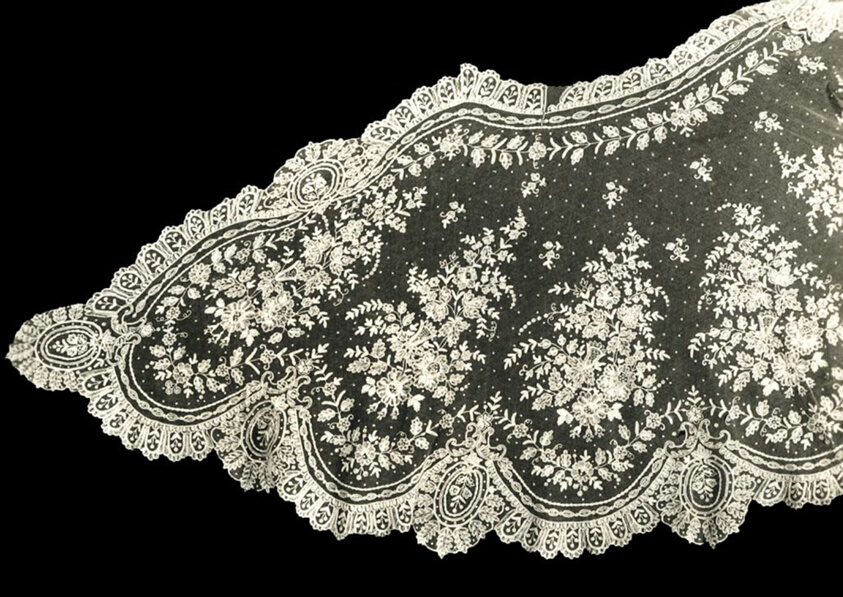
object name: Textile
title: Cape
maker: England or France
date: 1850s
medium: Cotton, machine-made twist net; embroidered in chain stitches (tambour work); edged with machine-made picots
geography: England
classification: textile; lace - mixed